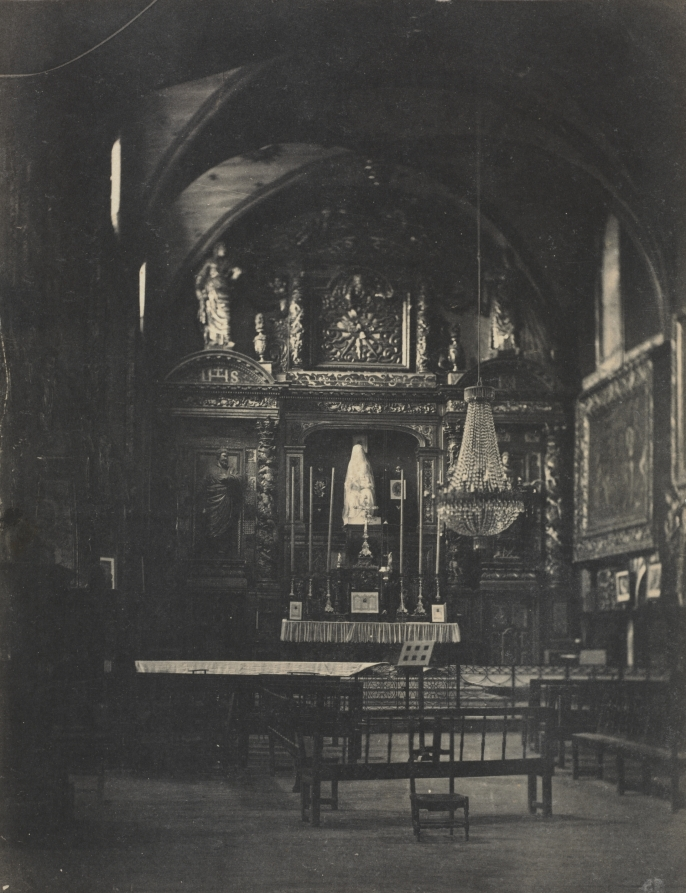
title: Church Interior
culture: England, 19th century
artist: Farnham Maxwell Lyte (British, 1828–1906)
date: c. 1855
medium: salted paper print, varnished, from wet collodion negative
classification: Photograph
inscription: Written in pencil on recto of mount: "Ch-ch at Metheram [?]"; "Maxwell Lyte"; "KJ1221"